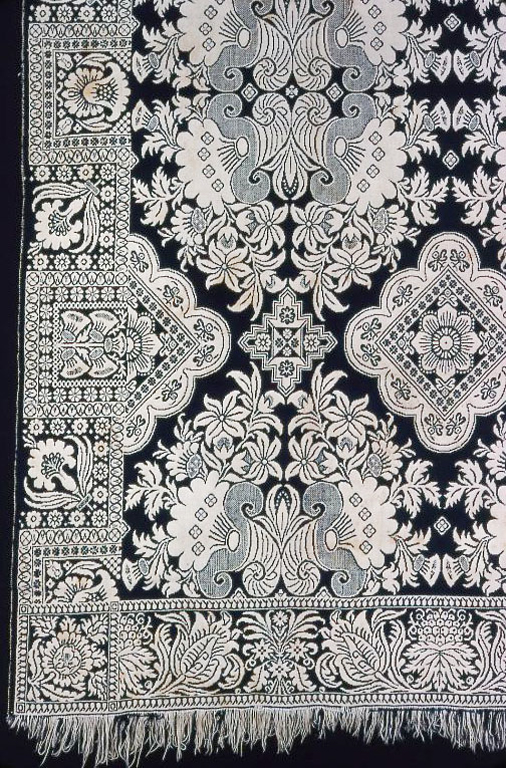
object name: Textile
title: Coverlet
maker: Hugh Gilchrist (American, born Scottish, 1806-1857); United States, Indiana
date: 1840/45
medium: Cotton and wool, plain weave double cloth; woven on loom with Jacquard attachment; two loom widths joined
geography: Indiana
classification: textile; coverlet; weaving - coverlet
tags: coverlet